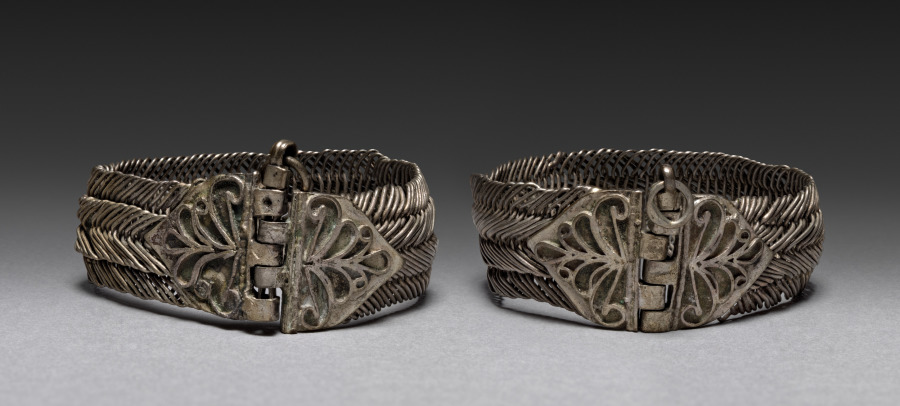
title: Bracelets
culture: Bulgaria, 18th-19th century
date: 1700s-1800s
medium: silver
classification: Jewelry